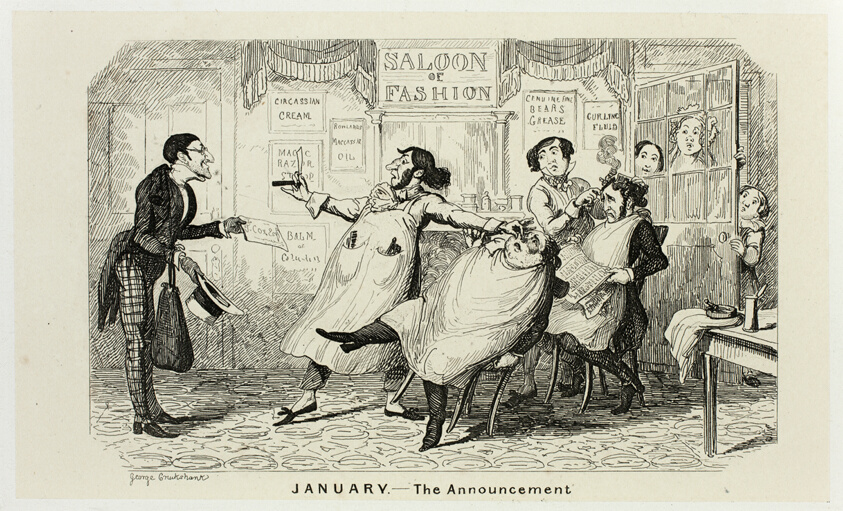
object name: Print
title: January - The Announcement from George Cruikshank's Steel Etchings to The Comic Almanacks: 1835-1853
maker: George Cruikshank (English, 1792-1878); published by Pickering & Chatto (English, 19th century)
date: 1840, printed c. 1880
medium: Steel etching in black on cream India paper, laid down on off-white card (chine collé)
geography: England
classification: etching; paper; steel; print; prints and drawing